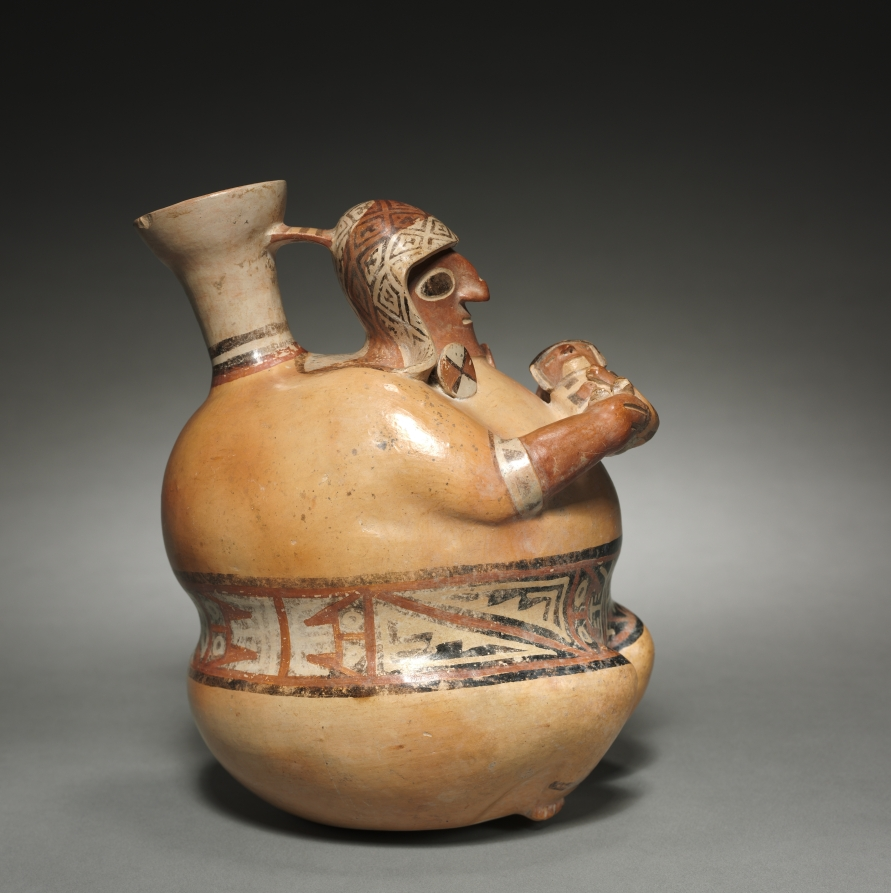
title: Mother-and-Child? Vessel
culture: Central Andes, North Highlands, Recuay people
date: 1–700 CE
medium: ceramic, slip, pigment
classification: Sculpture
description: Well-dressed, important women like this one are depicted fairly often in Recuay art. These women hold a variety of things, ranging from cups that may refer to feasts held on important political occasions to small figures commonly interpreted as children, as here. These and other representations have led scholars to suggest that Recuay women held authority independent of their male partners; their authority may have stemmed in part from involvement in feasting celebrations.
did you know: Recuay ceramics typically use only three colors: black, white, and red.